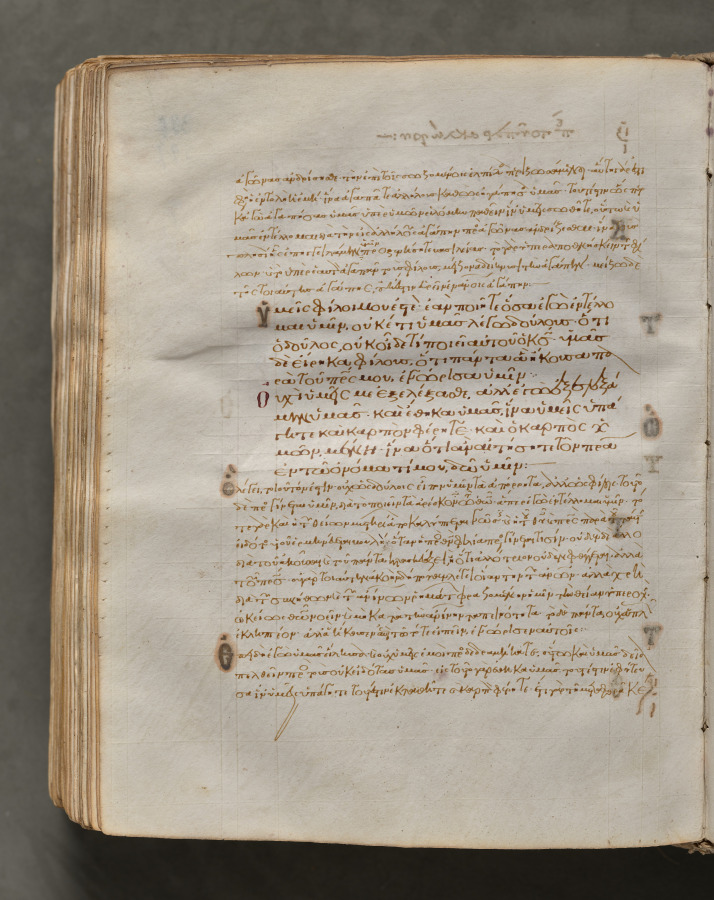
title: Text, folio 397 (verso), from a Gospel Book with Commentaries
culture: Byzantium, Constantinople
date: c. 1000–1100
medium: ink, tempera, and gold on vellum; leather binding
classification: Bound Volume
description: Each of the four gospels in this book opens on a page with brilliantly illuminated borders depicting the author of the text as well as birds—principally peacocks, symbols of the immortality of the soul—and fountains, representing the fountain of life and the salvation of the soul. This volume consists of 428 leaves with texts in Greek. Its level of sophistication suggests that it was probably written and decorated in a monastery in Constantinople.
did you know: Gospel books were carried in procession through Byzantine churches.